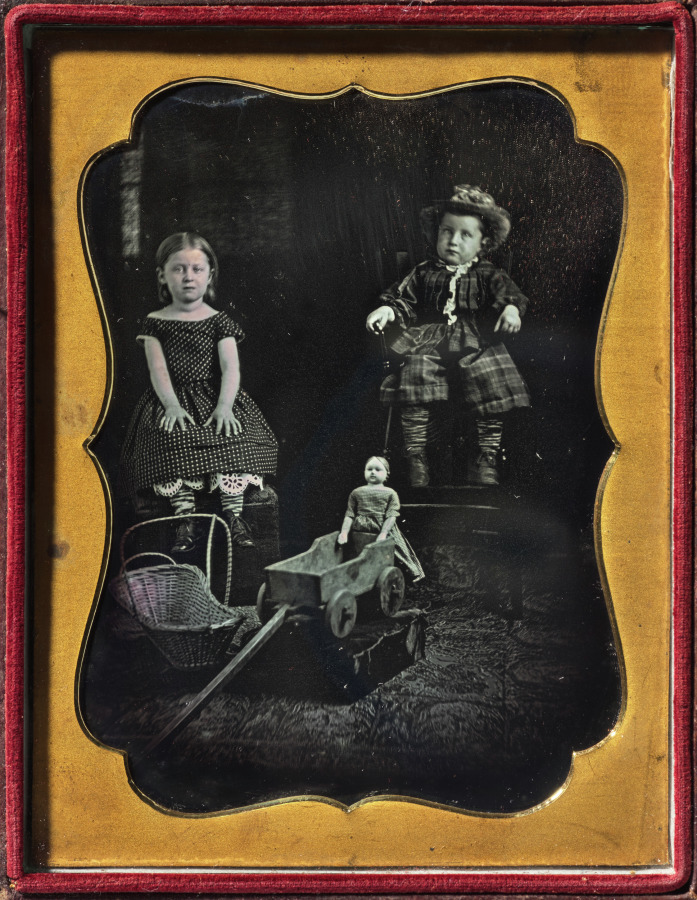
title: Two Children with Toys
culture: America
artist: Unidentified Photographer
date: c. 1855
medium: daguerreotype, quarter-plate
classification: Photograph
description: Children have always been particularly cherished subjects for photography. Portraits were made to preserve the memory of their stages of growth and, in an age when long-distance travel was rare, to share with faraway relatives. And, for a sadder reason: in 1840 an estimated one-third of children died before age five. Photography offered grieving parents the opportunity to immortalize their children’s features. This tragic genre of photographs, later called “post-mortems,” often depicts the children in fine clothing, laying down with eyes shut, as if merely napping.